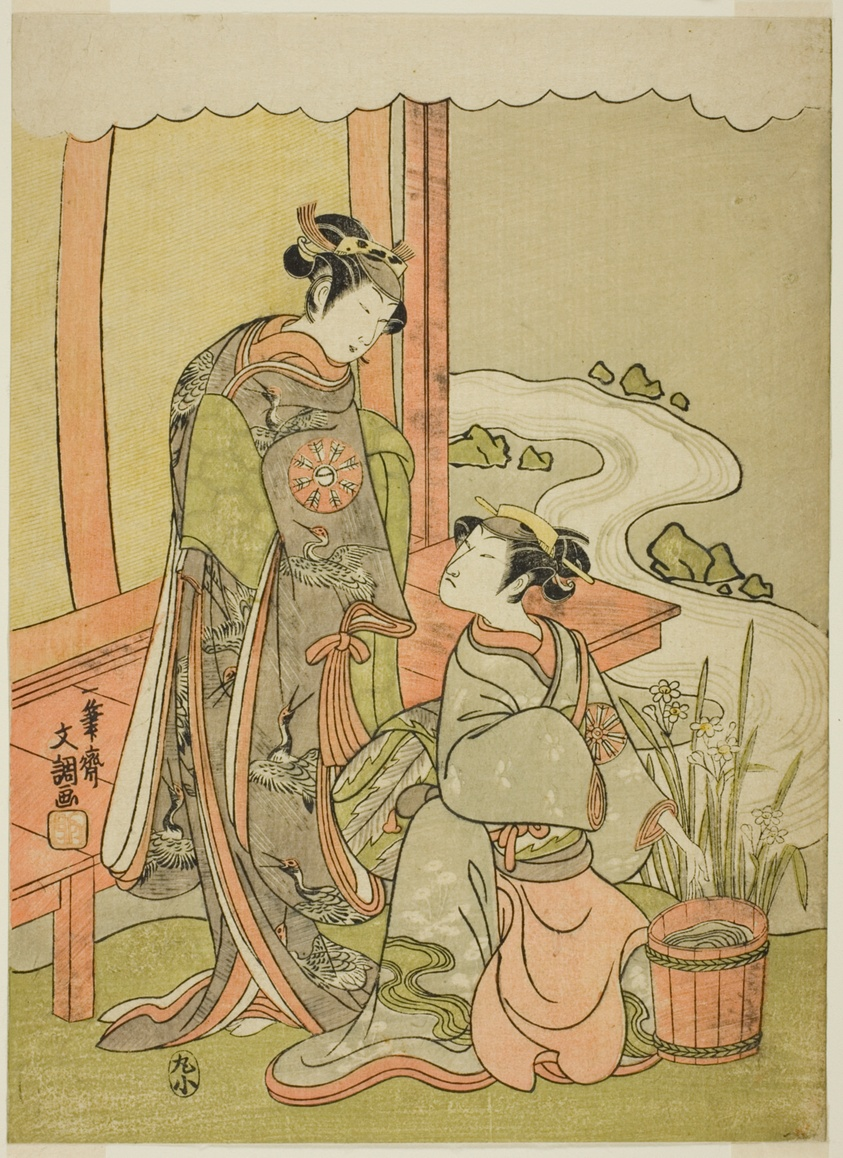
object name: Print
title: The Actors Nakamura Tomijuro I as Enju Disguised as the Shirbyoshi Gio (right), and Nakamura Noshio I as Goo Disguised as Hotoke Gozen (left), in the Play Miyako-zome Gio Katsugi, Performed at the Morita Theater in the Eleventh Month, 1770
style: Japanese (culture or style)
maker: Ippitsusai Buncho (Japanese, active c. 1755-90)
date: c. 1770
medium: Color woodblock print; chuban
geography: Japan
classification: woodblock print; print; asian art